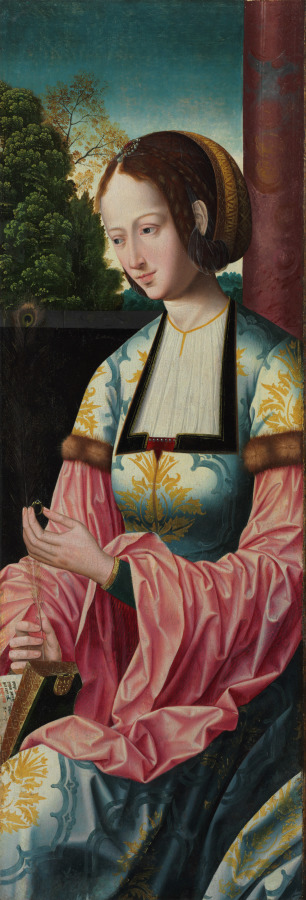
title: Saint Barbara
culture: Flanders, Bruges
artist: Master of the Holy Blood (Netherlandish)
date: c. 1520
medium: tempera on wood panel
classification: Painting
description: Saint Barbara holds both a book and a ring symbolizing her scholarly pursuits and union with God. According to legend, the leather thongs with which she was beaten were transformed into peacock plumes. This painting and one other in the collection (1942.633.1) were originally the wings of an altarpiece flanking a central panel, now lost, that may have depicted the Holy Family. The identity of this artist is unknown, but he is named for a painting in the Chapel of the Holy Blood in Bruges. Bruges flourished as an international commercial center through the 1400s and early 1500s. Among its residents were many foreign merchants and bankers who, along with the Burgundian court, patronized artists and attracted specialized craftsmen such as furriers, hatters, jewelers, and goldsmiths. Bruges’s artistic production in the 1400s included celebrated artists like Jan van Eyck, Petrus Christus, Hans Memling, and Gerard David who painted large altarpieces, small panels for private devotion, and portraits. Bruges also remained an important center for the production of illuminated manuscripts.